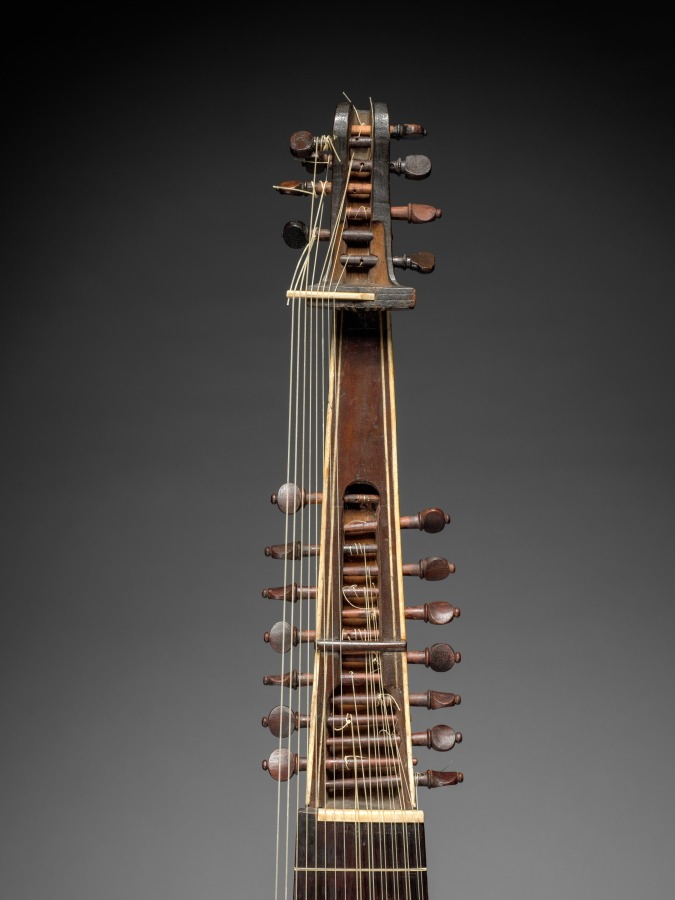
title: Lute or Tiorbino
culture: Italy, probably made in the mid-17th century, but modified by later repair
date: c. 1620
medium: wood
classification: Musical Instrument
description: The lute was the most important musical instrument in secular settings throughout the 16th and 17th centuries. Not only a virtuoso instrument with a huge repertoire, the lute provided the ideal accompaniment for the voice, played an essential role in ensembles, figured in masques and operas, and was played by amateurs as well as professionals. A highly specialized instrument, this tiorbino is a type of long-necked lute resembling a theorbo, but significantly smaller and pitched an octave higher. An object of great rarity, it is one of the smallest Baroque tiorbinos to survive.